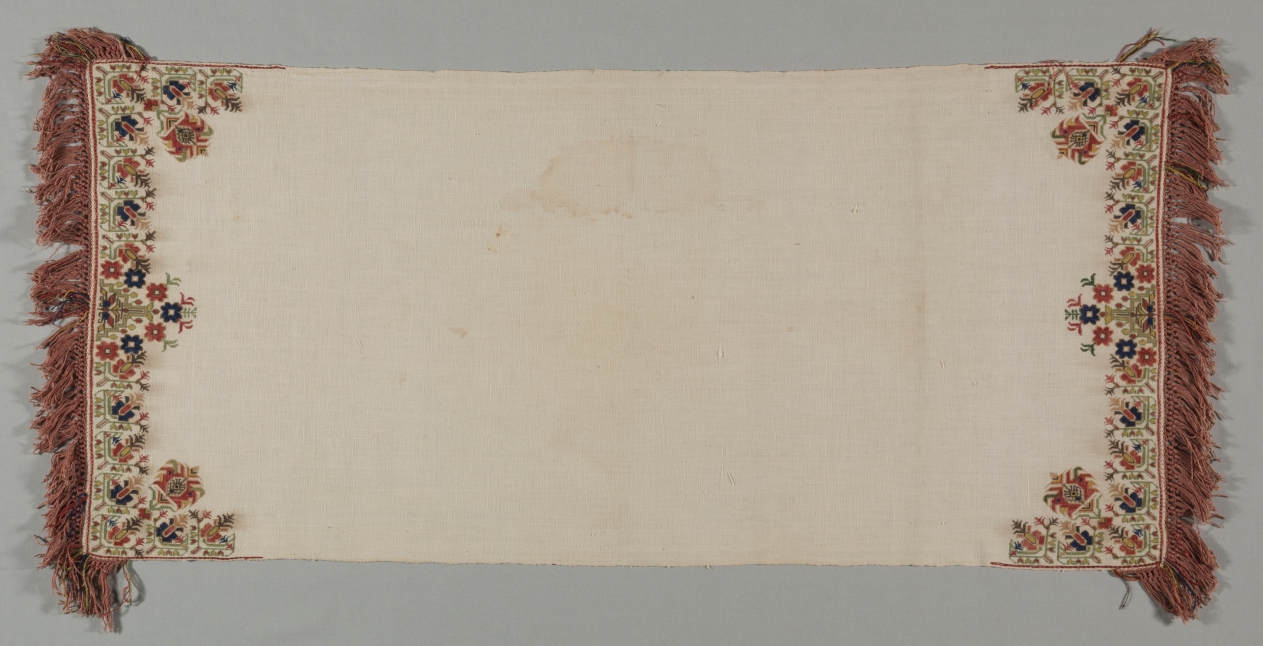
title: Embroidered Towel (Peshkir)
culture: Turkey, 19th century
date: 19th century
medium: embroidery: silk on cotton tabby ground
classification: Embroidery